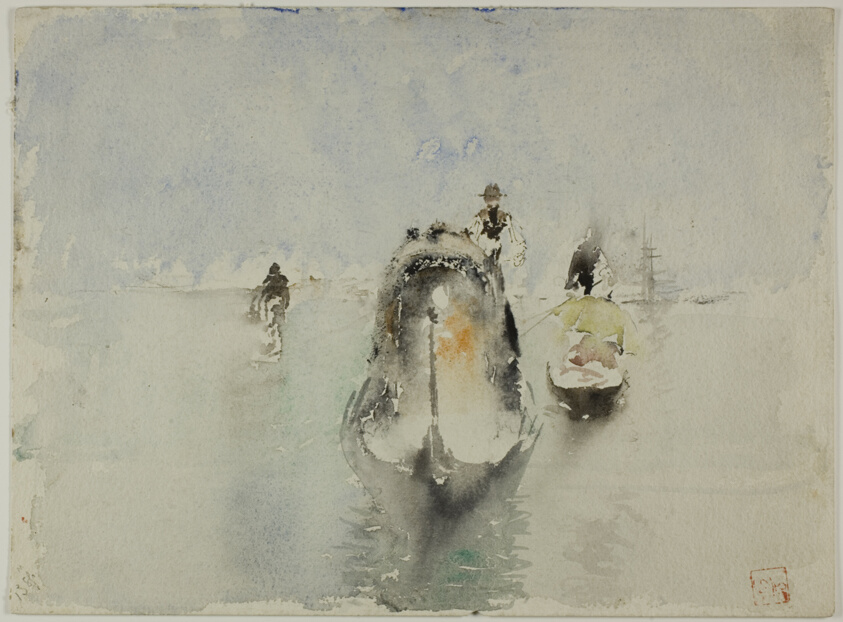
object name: Drawing and Watercolor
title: Gondolas, Grand Canal, Venice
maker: Robert Frederick Blum (American, 1857-1903)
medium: Watercolor over traces of black chalk on ivory wove paper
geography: United States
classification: drawings (visual works); prints and drawing